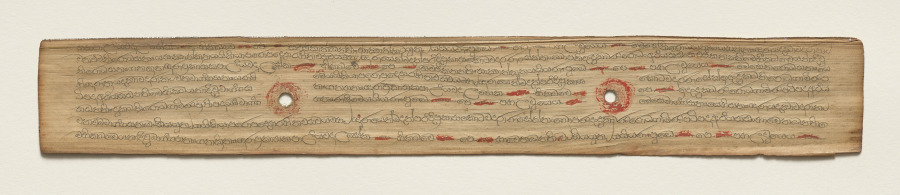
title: Leaf from a Buddhist Manuscript (verso)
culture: Sri Lanka, Singhalese, Late 17th century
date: c. 1700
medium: fiber paper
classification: Manuscript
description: Palm leaf material is still used for manuscripts in Sri Lanka. The palm leaves are prepared first by boiling them, drying them in the sun, and then rubbing them with oils. Scribes then use a metal stylus to incise the text. Then charcoal powder is wiped across the pages, filling in only the inscribed lines.